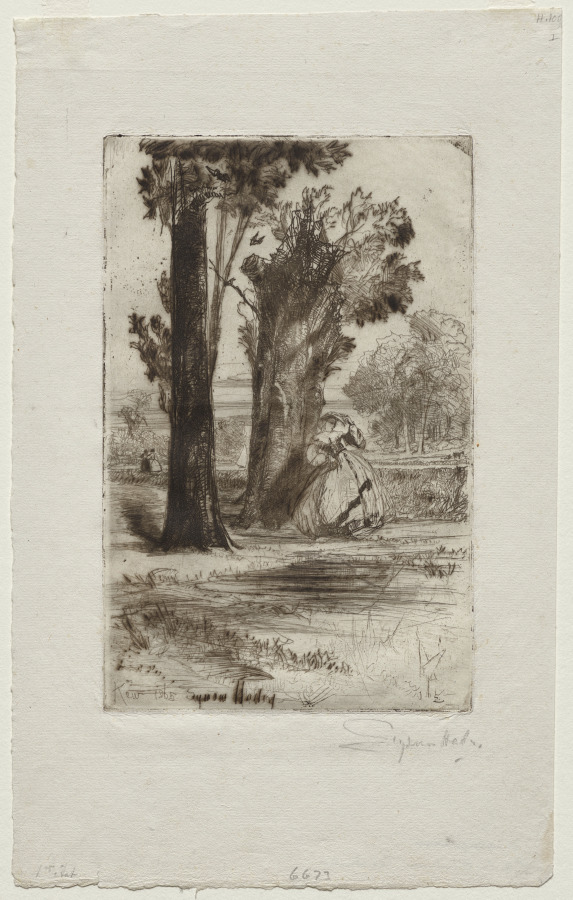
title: Vicarage at Sonning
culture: England, 19th century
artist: Francis Seymour Haden (British, 1818–1910)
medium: etching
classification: Print